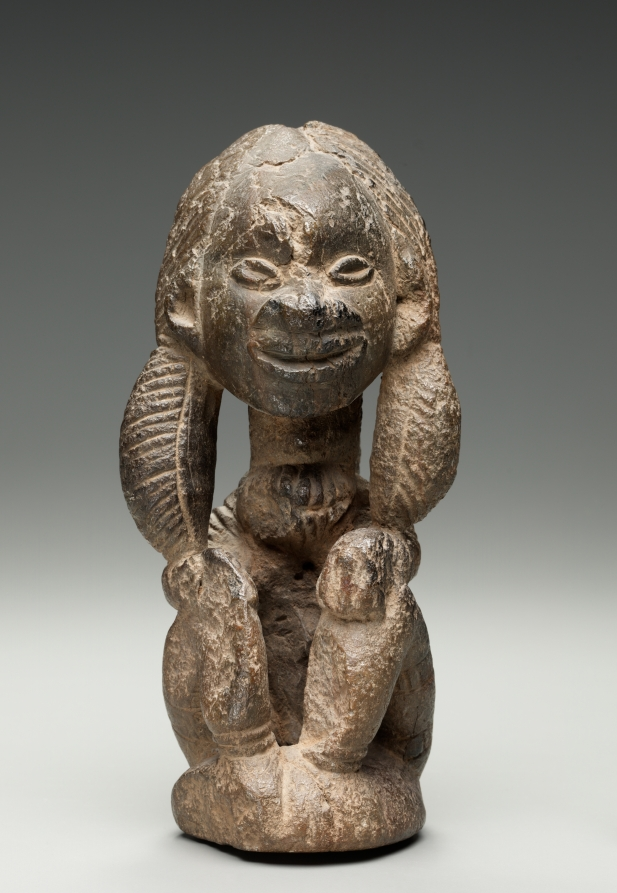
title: Figure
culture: Africa, West Africa, Sierra Leone, Sapi-style carver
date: possibly early 1400s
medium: soapstone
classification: Sculpture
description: The most varied group of soapstone figures and heads has been found in the homelands of the Kissi. Calling them pomda ("images of the dead"), the Kissi placed them in ancestral shrines, offering them the last seeds at sowing times and the first fruits of the harvest. However, the sculptures are believed to have been made centuries ago by the ancestors of the Kissi, the so-called Sapi people.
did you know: Sapi sculptors worked in stone—like in this sculpture—as well as ivory.